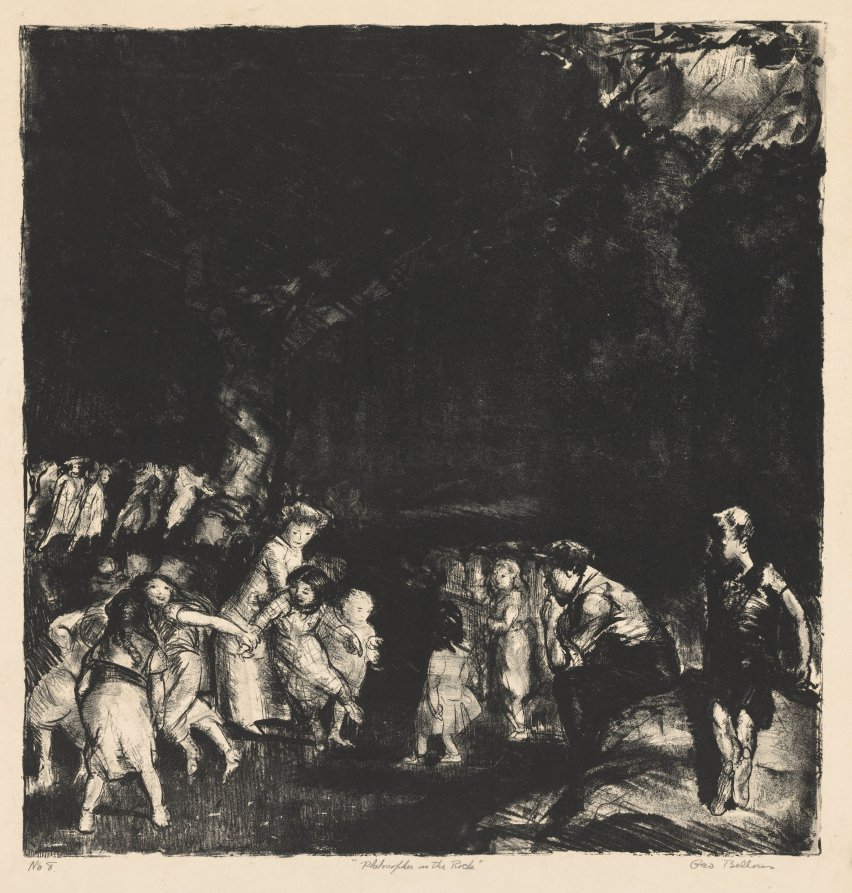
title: Philosopher on the Rock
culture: America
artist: George Bellows (American, 1882–1925)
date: 1916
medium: lithograph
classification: Print